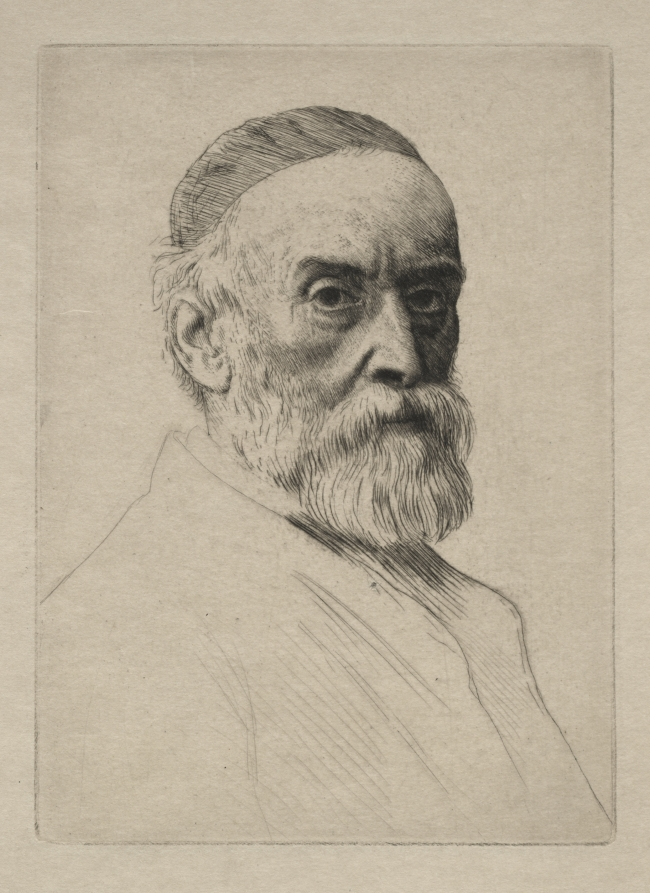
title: George Frederic Watts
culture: France, 19th century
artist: Alphonse Legros (French, 1837–1911)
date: 1879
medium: drypoint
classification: Print